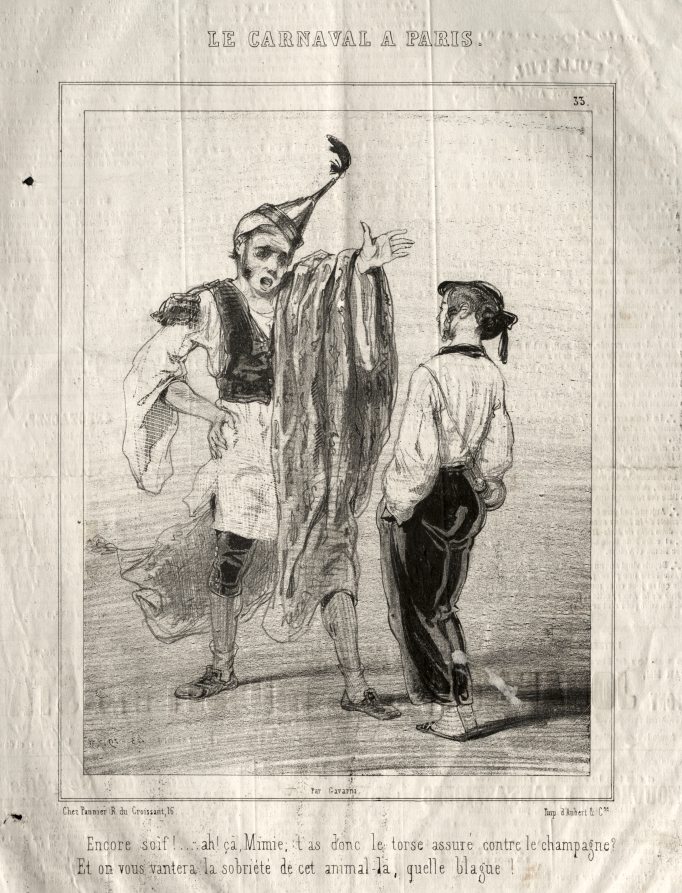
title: Carnaval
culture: France, 19th century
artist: Paul Gavarni (French, 1804–1866)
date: 1841–1843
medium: lithograph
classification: Print